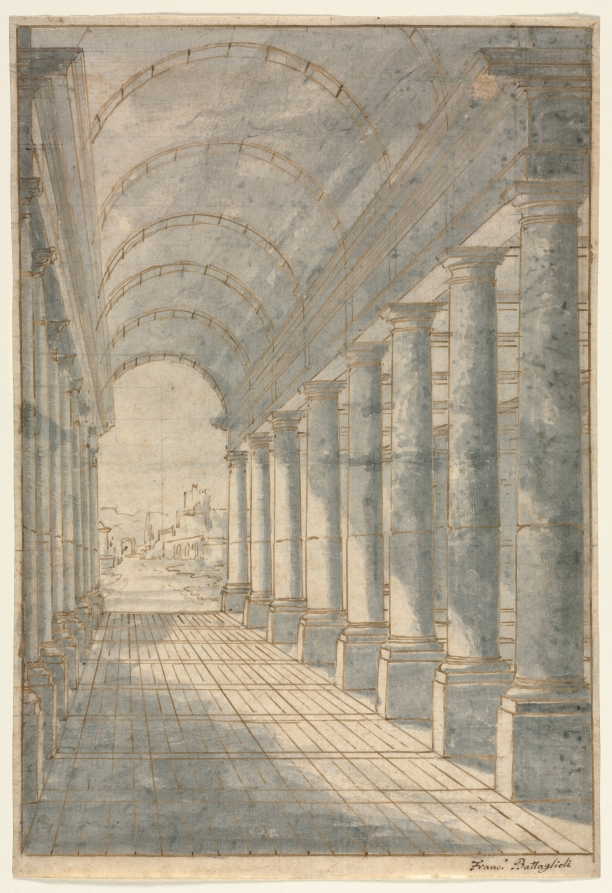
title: Barrel-Vaulted Arcade Rendered in Perspective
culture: Italy, 18th century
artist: Francesco Battaglioli (Italian, 1725–1796)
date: c. 1780–96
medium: pen and brown ink and brush and blue-gray wash, over graphite (ruled in places); framing lines in pen and brown ink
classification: Drawing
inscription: signed, lower right, in brown ink: Franc.° Battaglioli